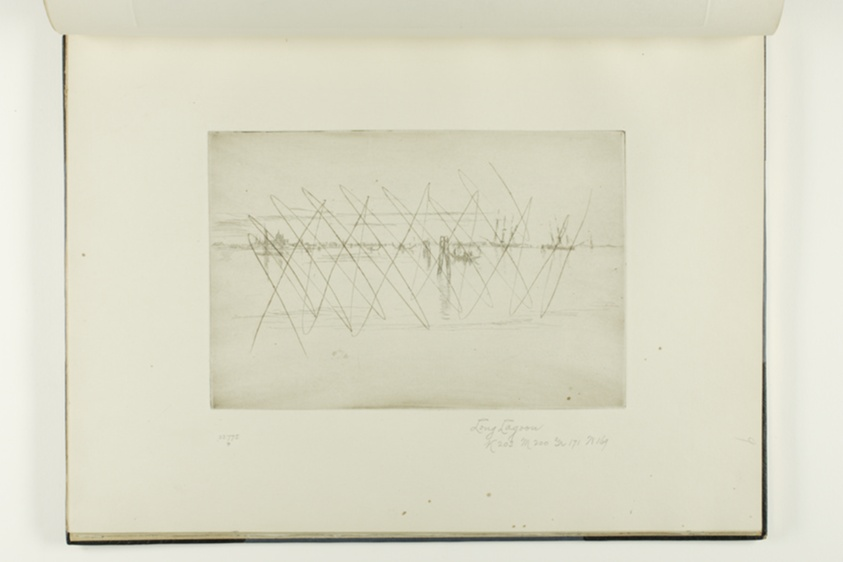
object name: Print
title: Long Lagoon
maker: James McNeill Whistler (American, 1834-1903)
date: 1879/80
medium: Etching and drypoint, with drypoint cancellation, in black ink on ivory laid paper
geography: United States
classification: etching; prints and drawing; print; drypoint; book; paper